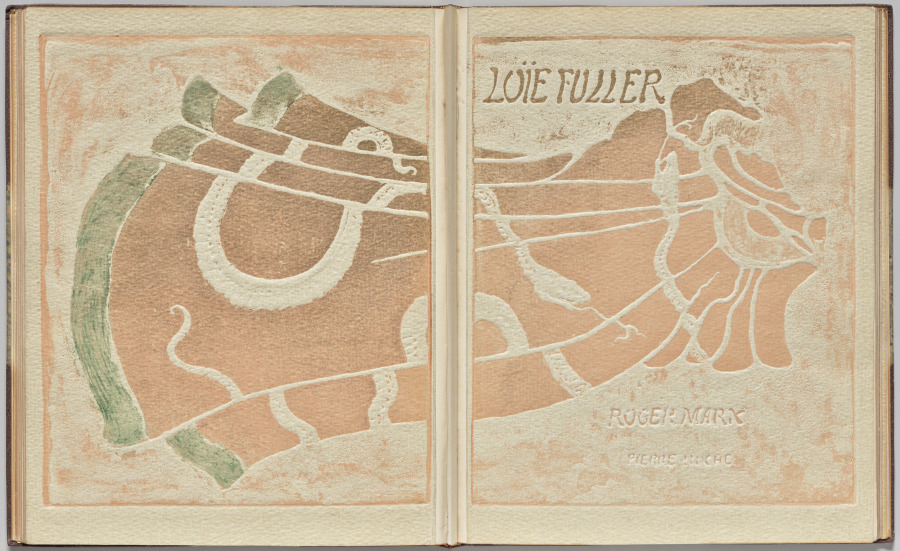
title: Decorative Drapery Motif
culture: France, early 20th Century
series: La Loïe Fuller, by Roger Marx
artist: Pierre Roche (French, 1855–1922)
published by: Les Cents Bibliophiles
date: 1904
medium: gypsograph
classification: Bound Volume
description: Although best known as a sculptor, Roche was a versatile and prolific artist who worked in many mediums. Loïe Fuller, the pioneer of modern dance who took Paris by storm in 1892, was one of his favorite subjects. He portrayed her in clay, bronze, marble, plaster, and in a series of gypsographs that illustrated an essay by the art critic Roger Marx. The book was described as "a precious monument to Loïe Fuller."